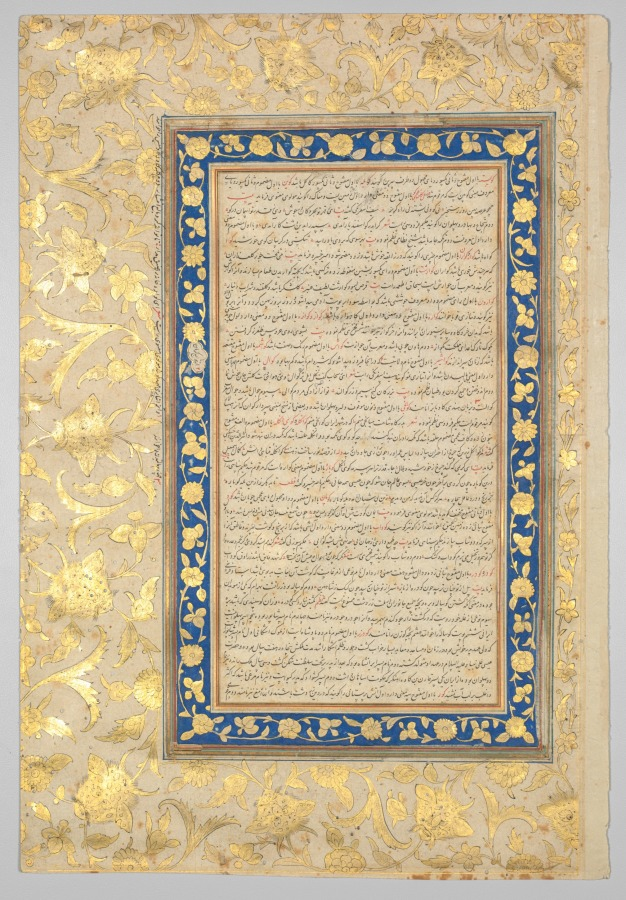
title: An Illuminated Folio from the Royal Manuscript of the Farhang-i Jahangiri (recto)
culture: Mughal India, court of Jahangir (1605–1627)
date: 1607–8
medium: Gum tempera, ink, and gold on paper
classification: Painting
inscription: Recto: “kuyesteh” (misspelling of “kunisteh,” meaning two halves of the buttocks) to “Gur” (name of a people in India)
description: Farhang-E Jahāngīrī, one of the most complete and authoritative dictionaries of the Persian language, was compiled by Mir Jamal al-Din Husayn Inju. It took him twelve years to compile over 9,000 words with definitions and examples from verses by Persian poets. He was born in Shiraz, Iran, but lived most of his life in Agra, India, so the dictionary was named honor of the Mughal emperor Jahangir, who reigned from 1605 to 1627.